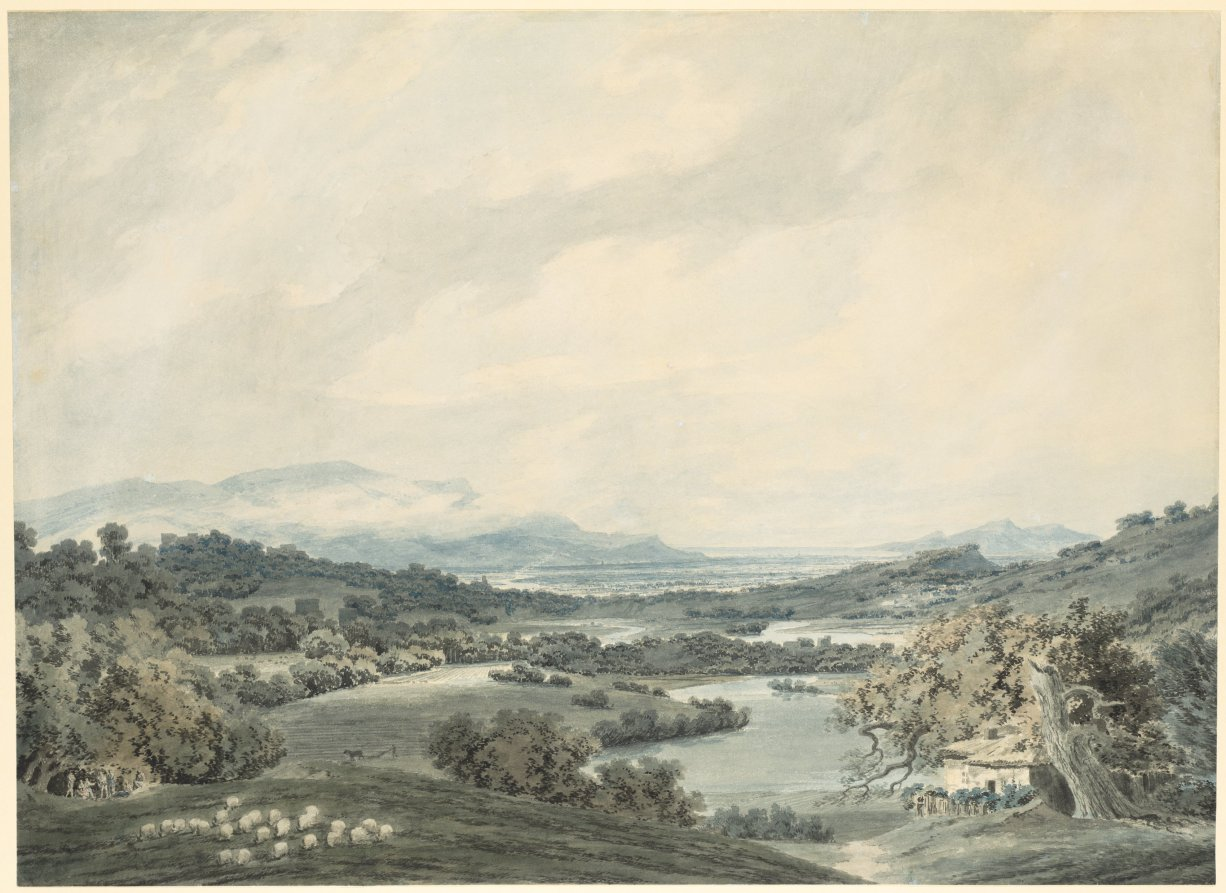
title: Italian Landscape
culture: England, London, 18th century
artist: John Robert Cozens (British, 1752–1797)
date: c. 1790–92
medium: watercolor over graphite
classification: Drawing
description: During the 18th century, views of Italy and the Continent were in great demand among British aristocrats on the Grand Tour. Cozens journeyed to Italy and Switzerland twice in his career, making pencil and wash sketches from which he later derived highly finished watercolors for various patrons. The artist’s somber palette, limited to muted greens, grays, and blues, produces a melancholy, hazy effect in this landscape. The site depicted here has thus far proved unidentifiable and may be an amalgamation of memory and imagination. The left portion of the composition relates to another watercolor depicting a view of Velletri, a town outside of Rome; the cottage and trees in the right foreground seem English, and the central plain and winding river appear to be pure invention.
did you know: John Robert Cozens's watercolors became widely known after the doctor who treated him during a mental breakdown in 1794 enlisted two other artists to produce copies for circulation.